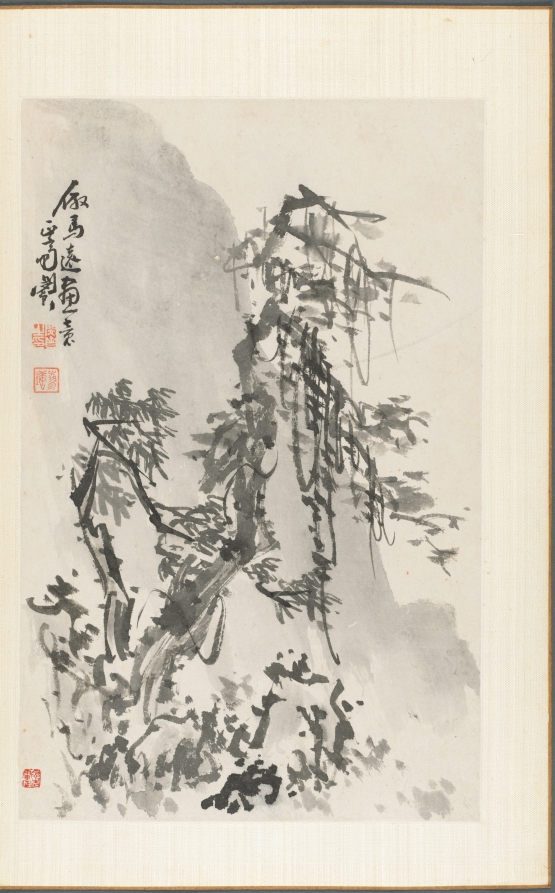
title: Landscape in the Manner of Ma Yuan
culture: China, Qing dynasty (1644-1911)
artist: Min Zhen (Chinese, 1730–after 1788)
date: 1788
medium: album leaf, ink on paper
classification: Painting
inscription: Inscription by Min Chen on the last leaf: I have a habit of collecting strange rocks. My friend Tai-li shan-jen* treasures my paintings as much as I treasure strange rocks. Once we agreed to exchange what we love with each other. However, my busy activities have kept me from carrying this out. This summer I realized that this strange rock has been sitting in my studio for five years, so I painted this to fulfill my old promise. As a record, I chose the grotesque cliff in the last scene of this twelve-leaf album. Cheng-chai, Min Chen inscribed this on the sixth day of the sixth month [July 9] of the wu-shen year [1788]. * Tai-li shan-jen is Wang Li [tzu: Li-fu] tr. Hou-mei Ishida Six seals appearing on the leaves: Min Chen, Cheng-chai, Ching-ch'iao, Chen, Liao-t'ang, Min Chen chih-yin.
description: Min Zhen, who was orphaned at age 12 and developed an eccentric personality, was trained by Tang Yin (1682–1756), a writer, playwright, and superintendent of the imperial porcelain workshops in Jingdezhen. The connection to him may have enabled Min to stay in Beijing for a decade from around 1773. It is not clear whether he ever resided in Yangzhou, but his style is in many instances reminiscent of that of Yangzhou artist Huang Shen. This album demonstrates Min’s versatility and mature style in the last years of his life.